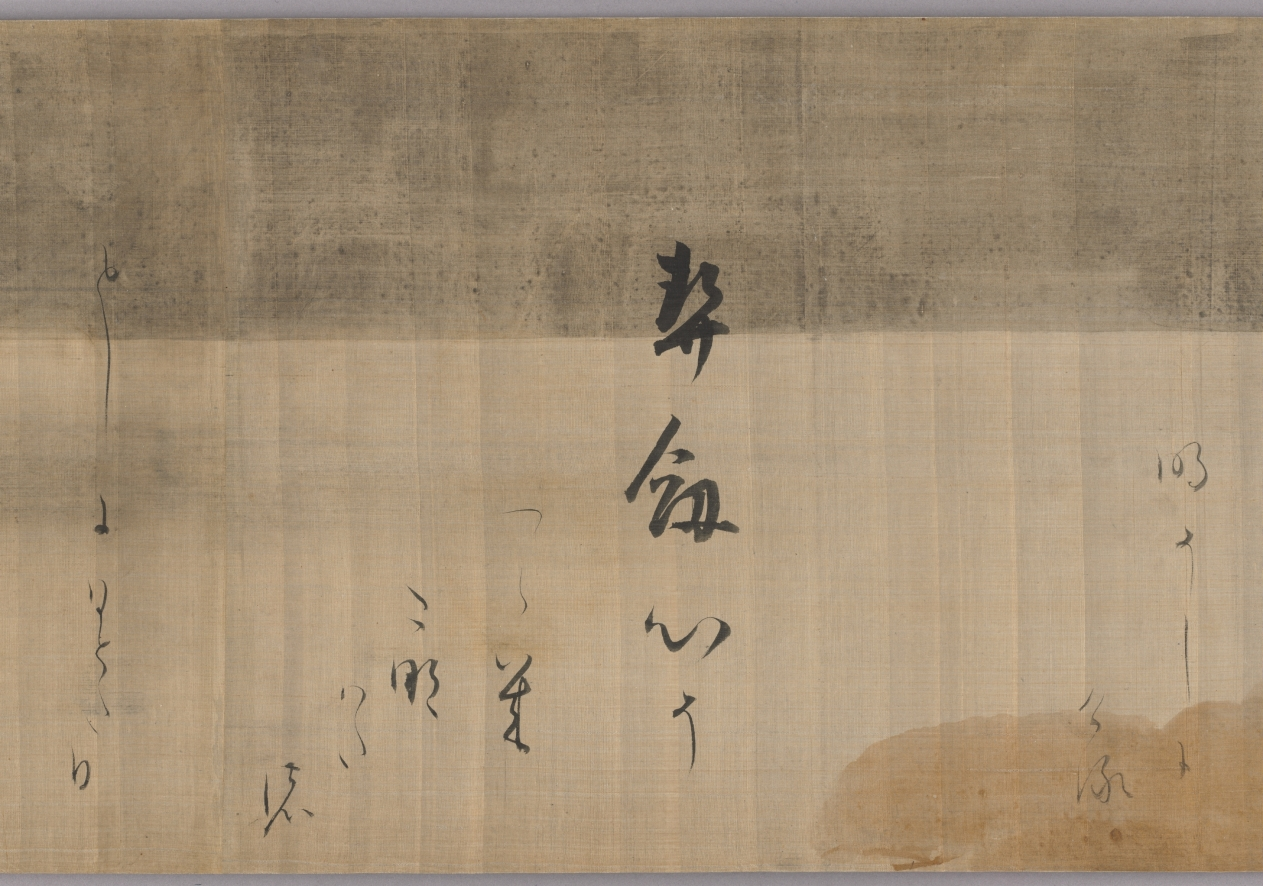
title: Selections from the Collection of Japanese Poems from Ancient and Modern Times (Kokin wakashū) with Design of Pines Along the Shore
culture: Japan, Momoyama period (1573-1615) to Edo period (1615-1858)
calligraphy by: Hon'ami Kōetsu (Japanese, 1558–1637)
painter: attributed to Tawaraya Sōtatsu (Japanese, c. 1570–c. 1640)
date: 1600s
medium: handscroll; ink on silk with gold and silver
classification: Calligraphy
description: The calligrapher and craftsman Hon’ami Kōetsu frequently collaborated with Tawaraya Sōtatsu, a painter who ran a studio that produced fans and screens. Sōtatsu’s work featured abstracted and flattened shapes, fields of color and gold, and asymmetry. In particular, motifs that appeared in small scale, such as flora and fauna, in early decorated Japanese papers were painted in a larger scale—blown up as if seen under a magnifying glass. For this handscroll, Kōetsu brushed poems from the autumn section of a poetry anthology onto silk with a landscape of pines in gold and silver likely painted by Sōtatsu.